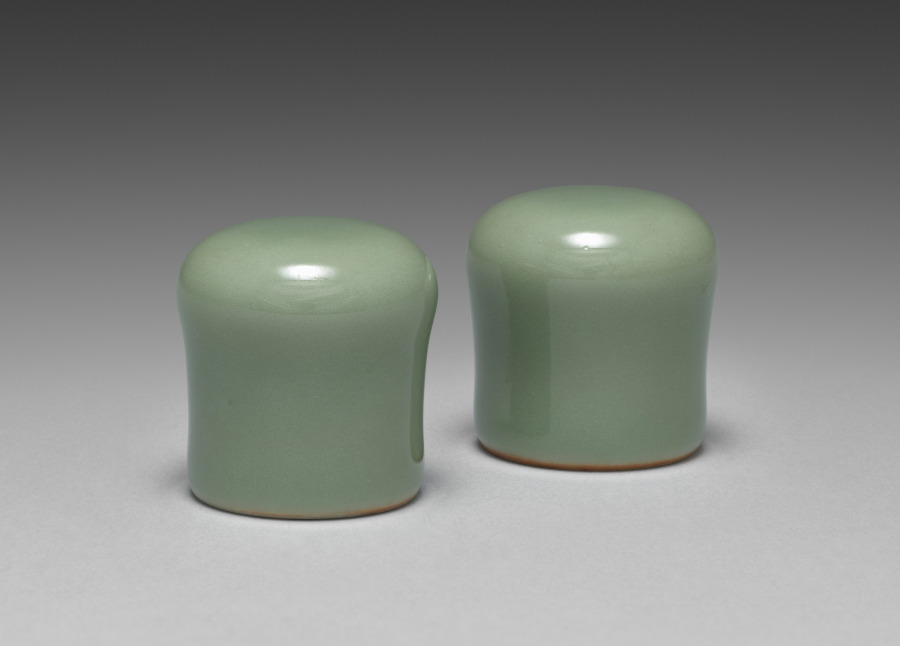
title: Roller Ends for Hanging Scroll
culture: Japan, Meiji period (1868–1912)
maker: Seifū Yohei III (Japanese, 1851–1914)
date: 1893–1914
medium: Pair of hanging scroll roller ends; porcelain with green glaze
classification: Ceramic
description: Before entering into his apprenticeship with Yohei II, Seifū Yohei III trained as a painter in Osaka. He continued to paint throughout his career as a ceramist. As part of his ceramic practice, Yohei III also made roller ends to be placed at either end of the wooden dowel around which the lower part of a hanging scroll mounting is wrapped. These served both as weights for the painting and as knobs for handling it when rolling and unrolling. The pair here is made of porcelain with a green glaze.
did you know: These are the roller ends for the hanging scroll by Seifū Yohei III, Rain Clearing over a Summer’s Mountain, CMA 2022.151.